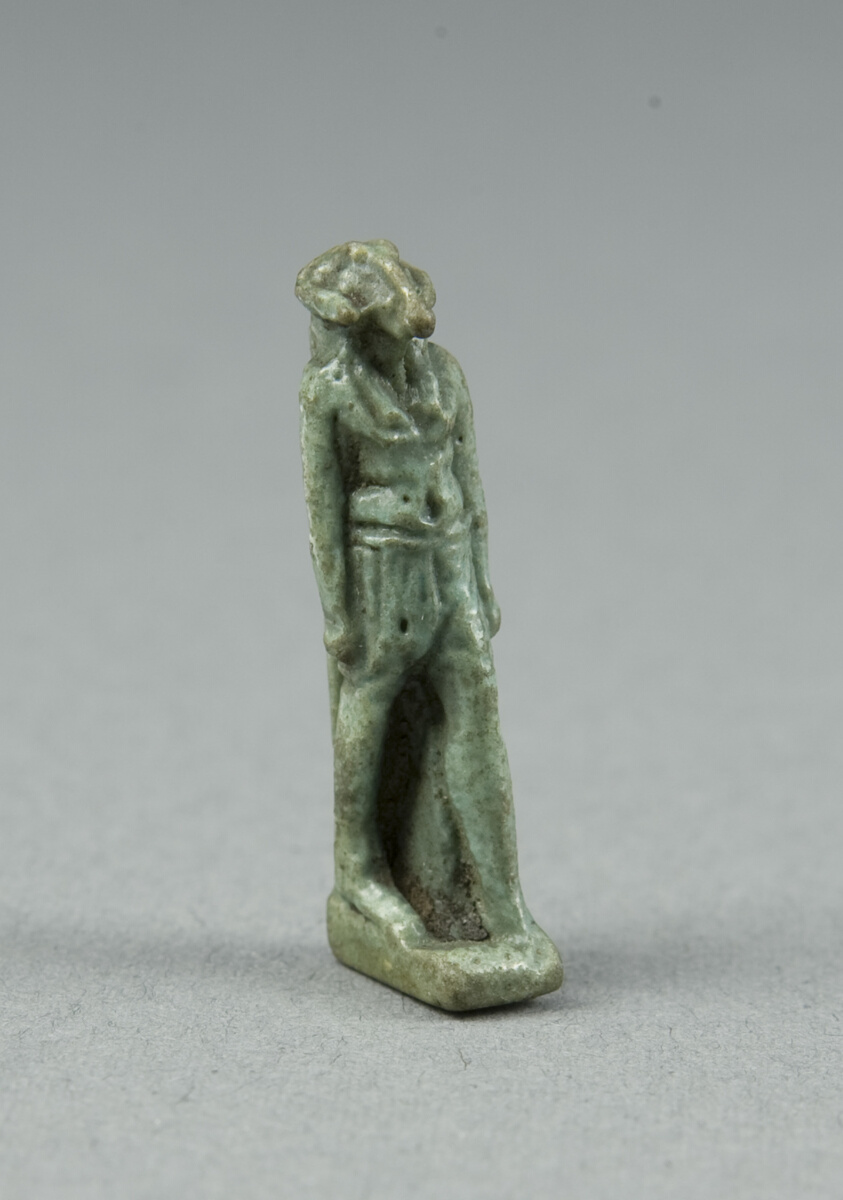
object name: Costume and Accessories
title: Amulet of the God Khnum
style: egyptian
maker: Egyptian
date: Ptolemaic Period (332–30 BCE)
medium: Faience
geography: Egypt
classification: amulet; jewelry; ceramics; ancient art; costume; faïence (composite material)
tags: gods (deities)